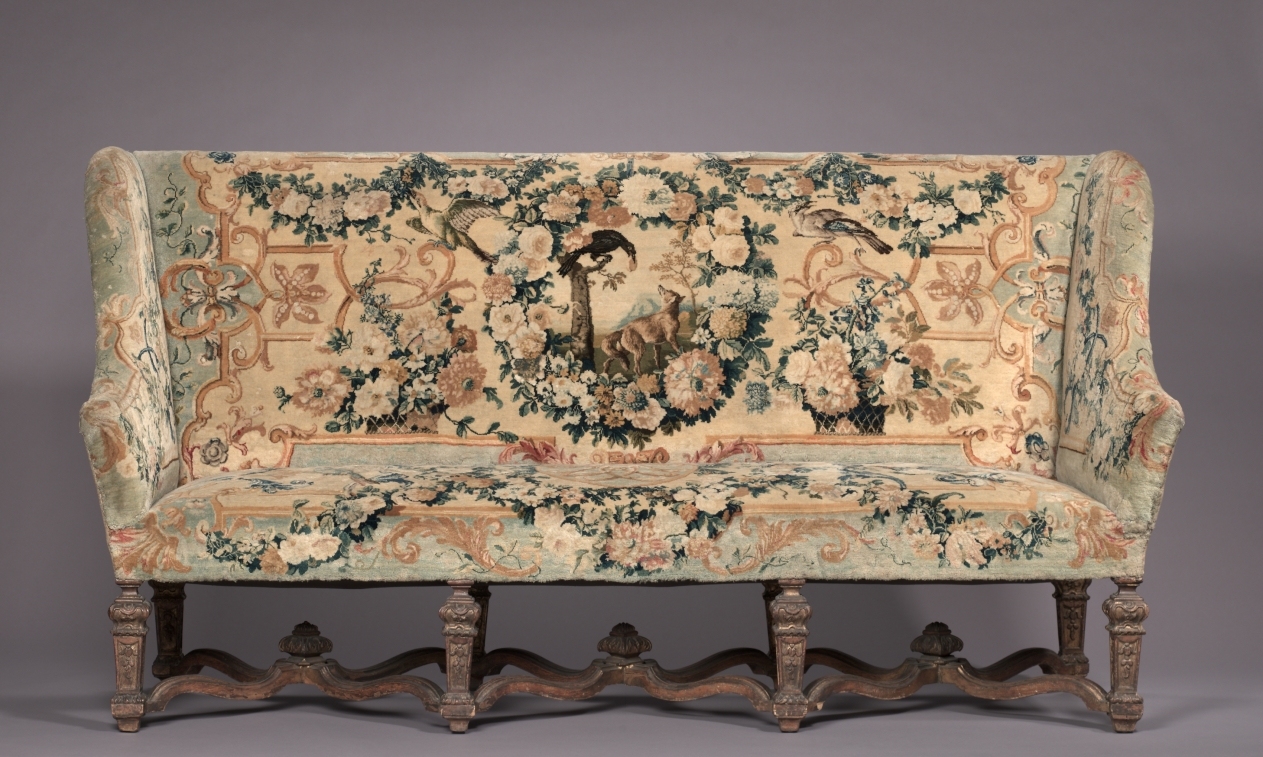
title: Settee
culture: France, 18th century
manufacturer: Royal Savonnerie Manufactory, Chaillot Workshops (French, est. 1627)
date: before 1717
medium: carved wood, Savonnerie knotted-pile (symmetrical rug knot) upholstery; wool, hemp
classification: Furniture and woodwork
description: These chairs belong to a suite that includes a settee (also in the CMA’s collection) and a tapestry made for a count and countess to mark their wedding in 1717. Furniture of this scale was usually placed against the wall in grand reception halls, more as a display of wealth than for use. Upholstered in Savonnerie tapestries, this suite was among the most treasured and expensive example anyone could own and typically reserved for royalty. To add decorative and intellectual interest to the textiles, weavers incorporated symbols depicting various stories from the Fables of Jean de La Fontaine, published from 1668 to 1694 and largely adapted from Aesop and other early storytellers.